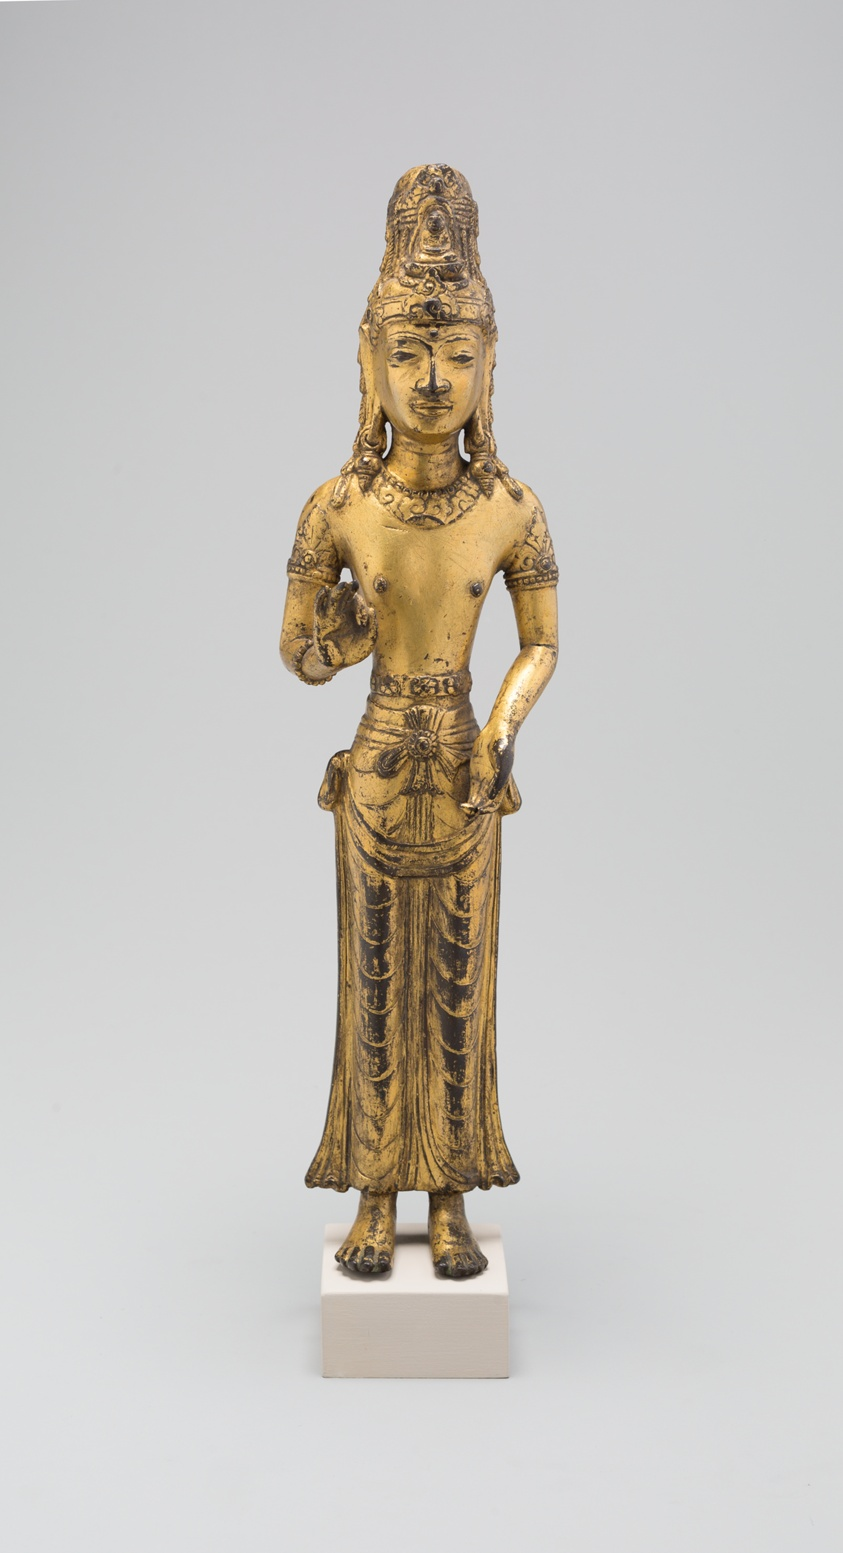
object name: Sculpture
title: Guanyin (Avalokiteshvara)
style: Chinese (culture or style)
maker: China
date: Dali kingdom (c. 937–1253), 12th century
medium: Gilt copper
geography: China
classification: bronze; metal; sculpture; asian art